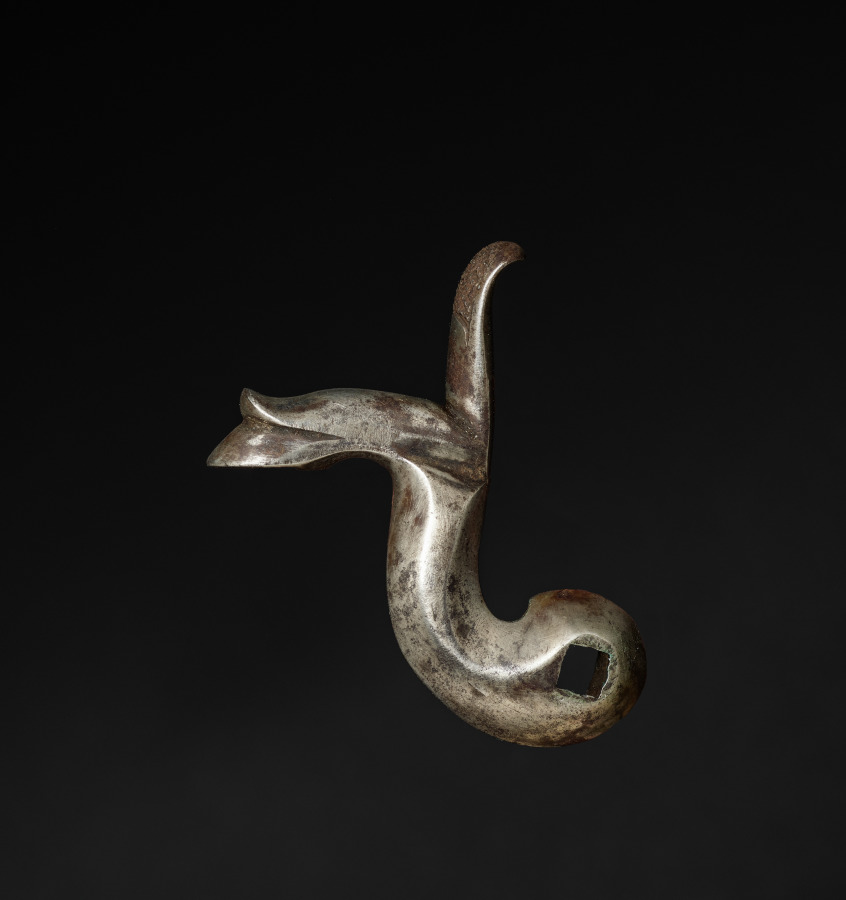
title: Gun-Lock Hammer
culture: England, early 19th century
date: c. 1800–1825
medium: steel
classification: Arms and Armor